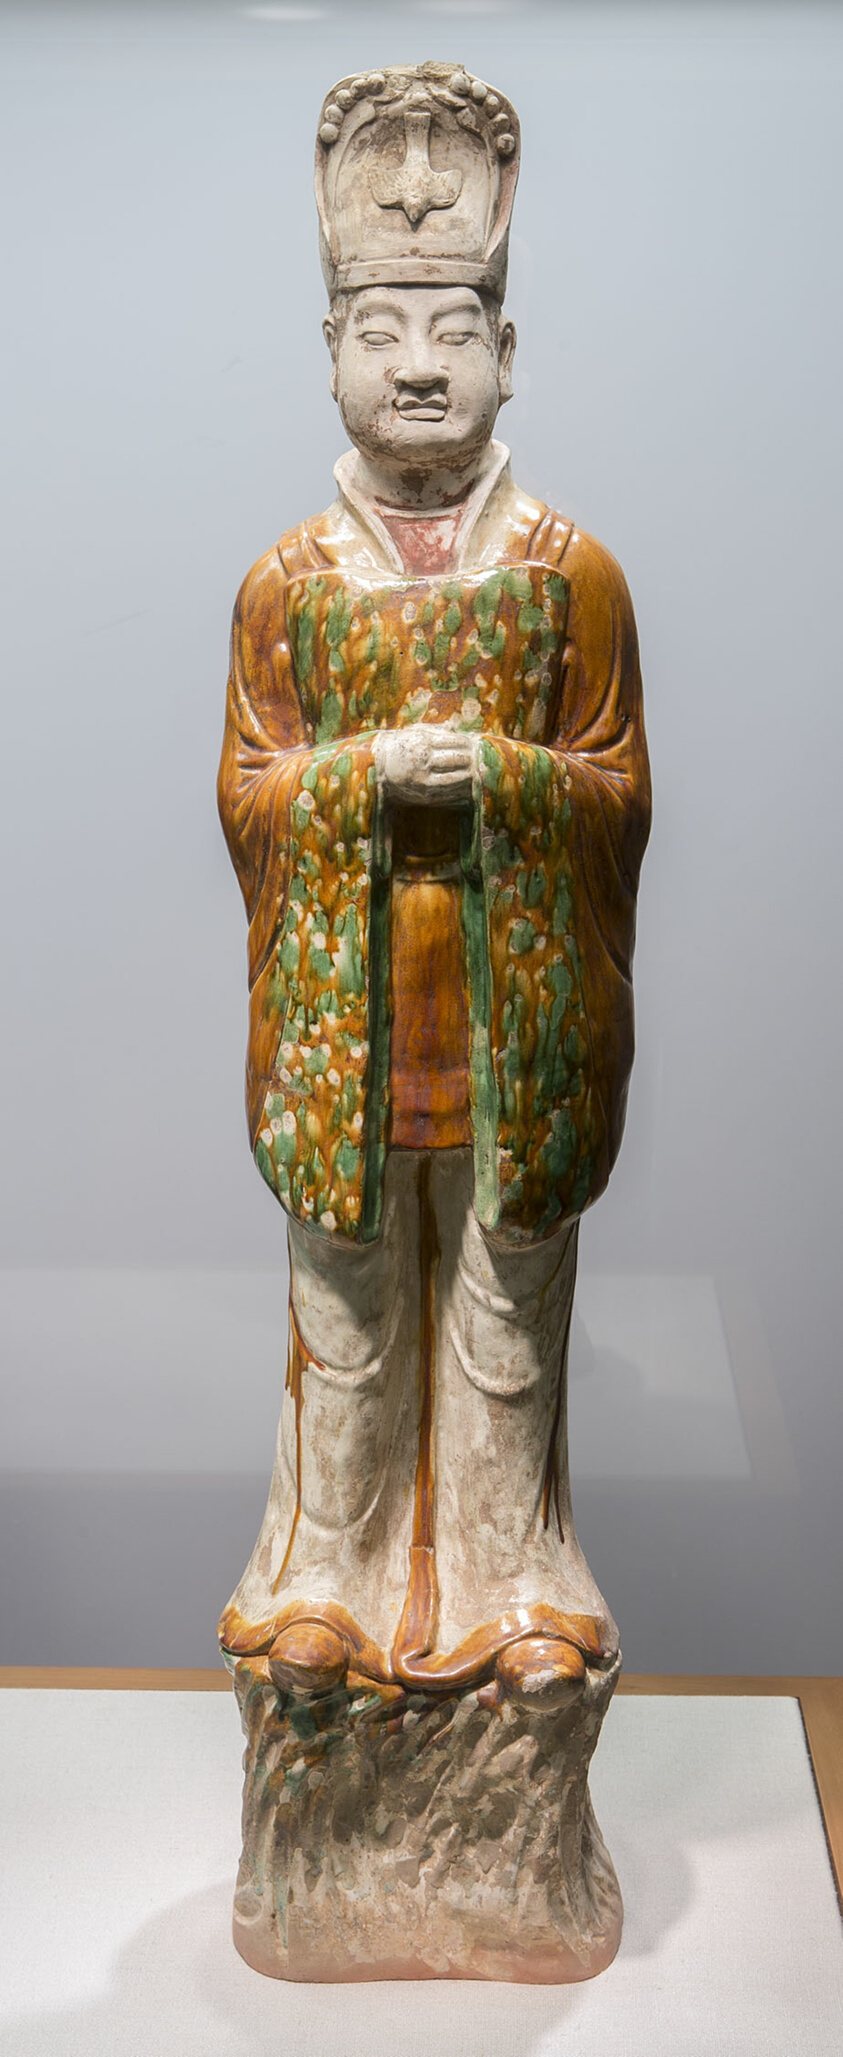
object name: Sculpture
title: Civil Official (Wenguan)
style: Chinese (culture or style)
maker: China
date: Tang dynasty (618–907 A.D.), 8th century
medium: Earthenware with three-color (sancai) lead glazes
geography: China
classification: ceramics; sculpture; asian art